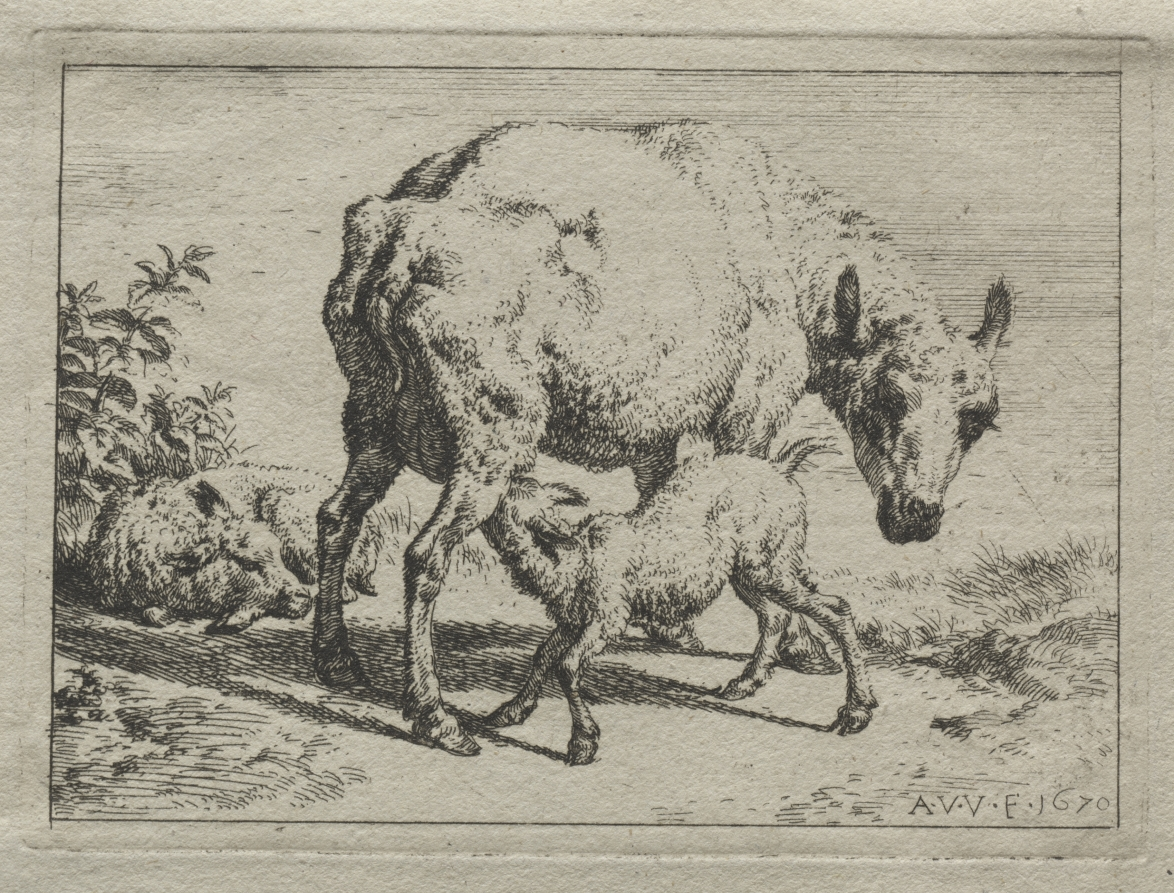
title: The Ewe and Two Lambs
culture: Netherlands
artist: Adriaen van de Velde (Dutch, 1636–1672)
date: 1670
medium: etching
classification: Print